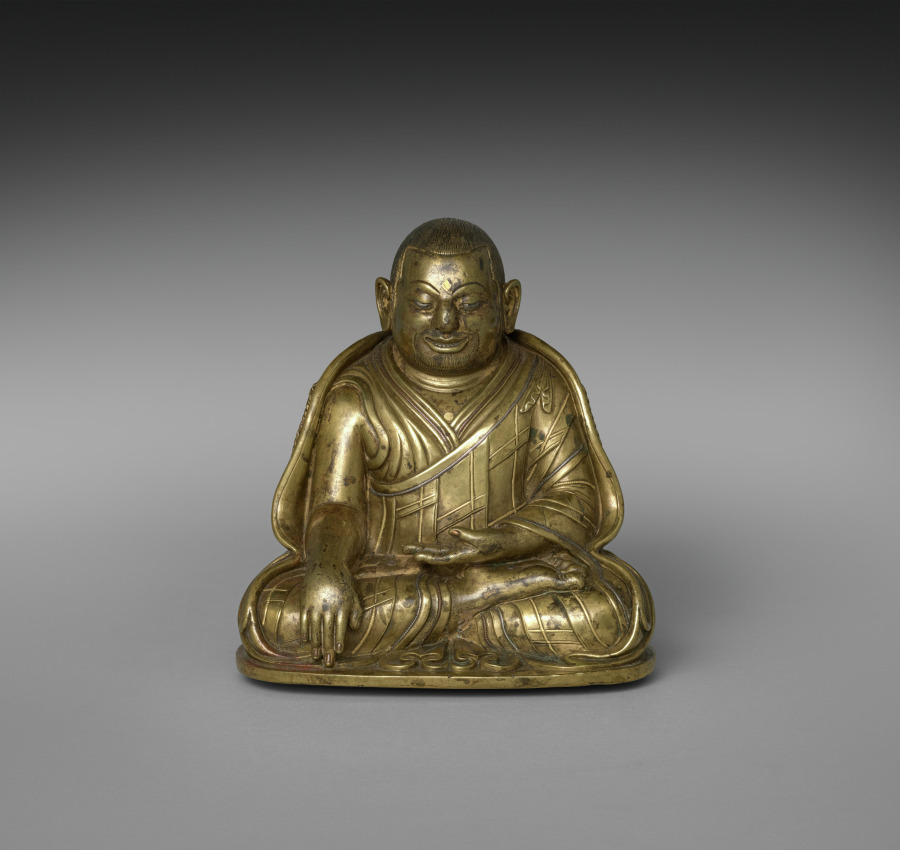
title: Portrait of Phagmo Drupa Dorje Gyalpo (1110–1170)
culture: Central Tibet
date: 1200s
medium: gilt bronze with gold, silver, copper, turquoise, lapis, and coral inlay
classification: Sculpture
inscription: / / Na mo 'ghu ru / / Ngan lam ban chung bdag gis ni / / bla ma Rin chen sku bzhengs pa yi / / bsod nams 'di yi byin brlabs kyis / / 'gro drug sdug sngal zad par shog / / Translation: "Salutations to the master ! May the sufferings of the six kinds of beings be appeased through the blessing of merit gained by me, the little monk of Ngan.lam, in having this statue of the Lama Rin.chen made."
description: This portrait statue depicts the first monastic leader of the prominent Buddhist monastery of Densatil, an influential early leader of the Tibetan Buddhist monastic order called Kagyu, famous for his views on the importance of meditation. He sits on a lotus pedestal and lion throne, like a Buddha, and his hand positions (mudras) communicate that meditation leads to enlightenment.